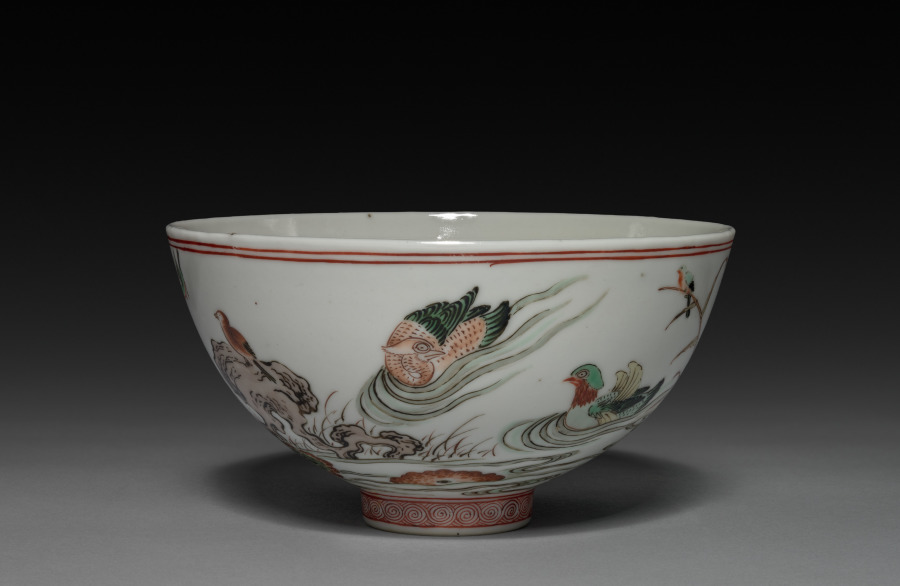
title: Bowl with Waterfowl on a Lotus Pond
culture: China, Jiangxi province, Jingdezhen kilns, Qing dynasty (1644-1911), Kangxi reign (1662-1722)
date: 1662–1722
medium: porcelain with famille verte overglaze enamel decoration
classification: Ceramic